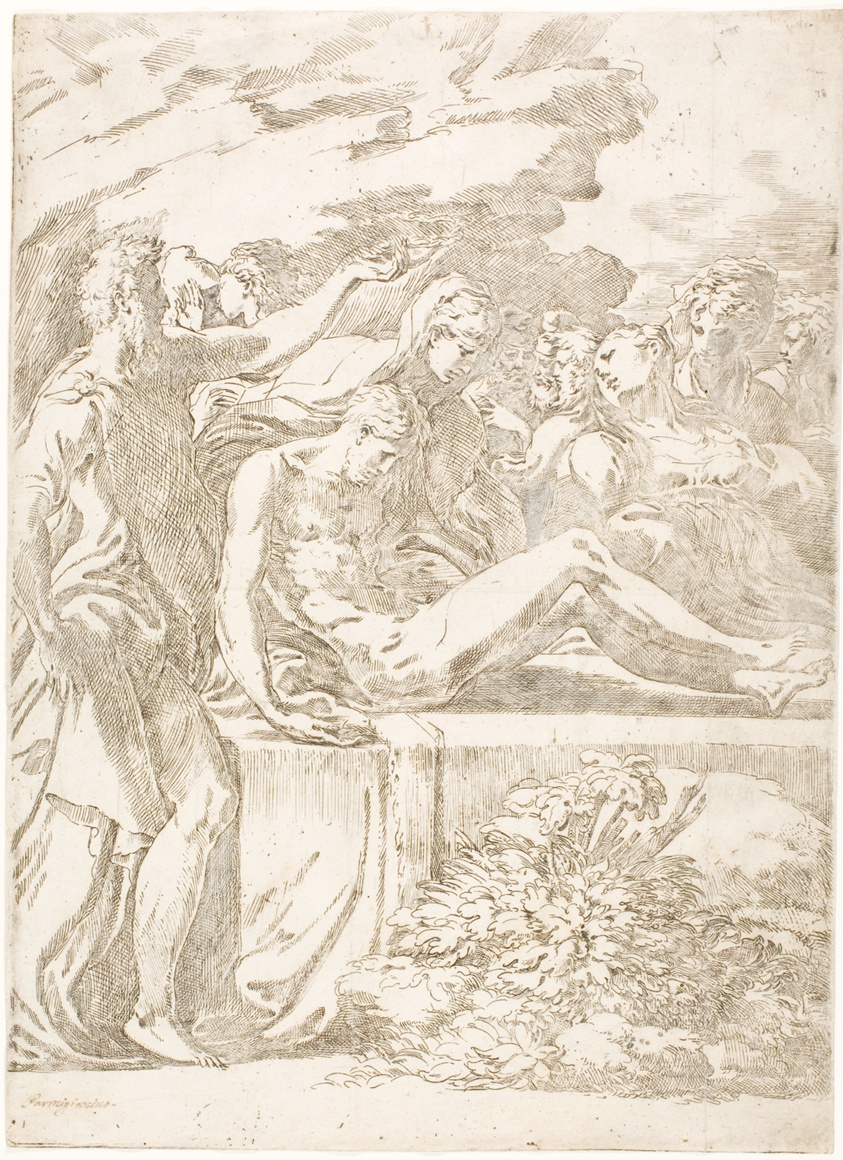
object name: Print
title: The Entombment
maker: Parmigianino (Italian, 1503-1540)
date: c. 1525–35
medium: Etching, printed in black, on paper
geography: Italy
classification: etching; print; prints and drawing